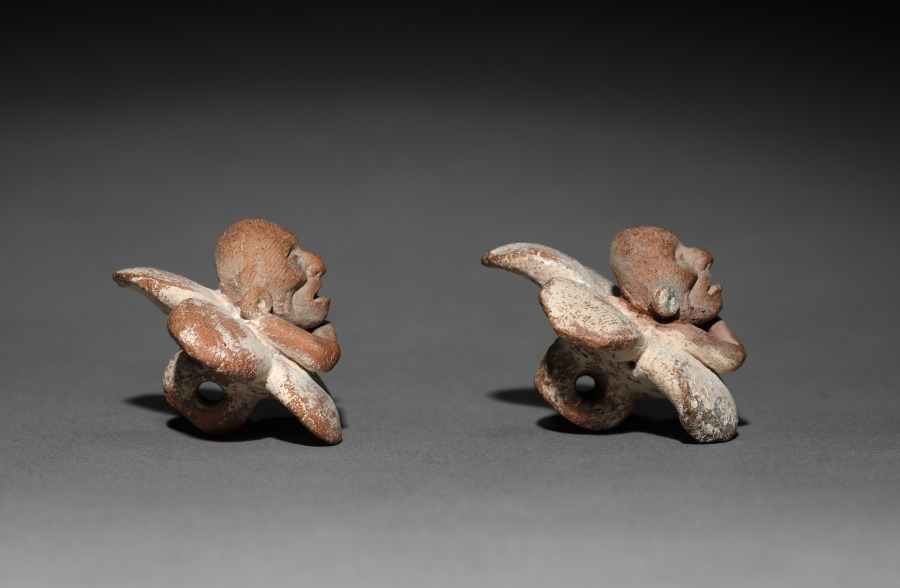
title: Pair of Figure in Flower Ornaments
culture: Mexico, Yucatán, Jaina Island region, Campeche, Maya style (250-900)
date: 500–900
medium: earthenware with slip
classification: Jewelry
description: Figures within flowers are one of the most enchanting themes of the Maya ceramic art of Jaina, an island off the western Yucatán coast. The figures, usually males who cross their arms over their bodies, are either radiantly youthful or aged (as here), suggesting a relationship to the life cycle.